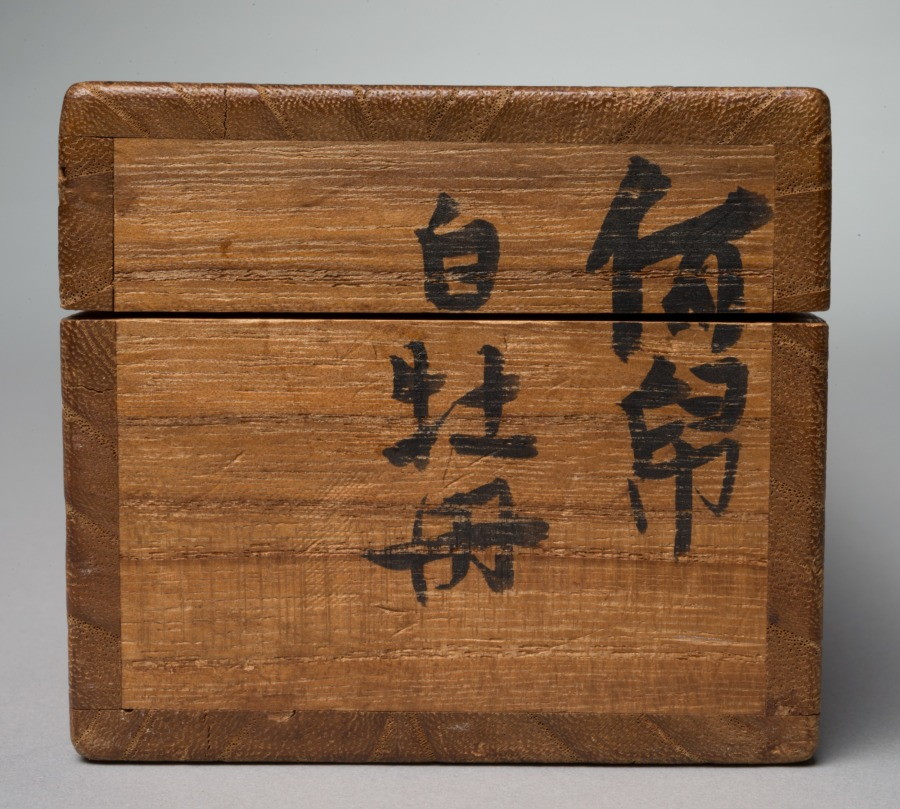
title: Peonies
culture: Japan, Edo period (1615–1868)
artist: Tatebayashi Kagei (Japanese, active mid-1700s)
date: mid 1700s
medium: hanging scroll; ink and color on paper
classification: Painting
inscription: lower right, Kagei's signature in black, a round red seal and a small square one.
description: A proliferation of white tree peonies dominates this composition. Behind them are tall, feathery-topped susuki grasses and leafy deciduous trees. Tatebayashi Kagei restricted his palette to ink with red and white color, along with sparing use of green in the peony leaves and the blades of grass. He made generous use of the “dripping-in” (tarashikomi) technique, layering pooled ink and color, in the peony leaves. The areas left in reserve create the impression of insect-eaten or late season foliage.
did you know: In 1738, Kagei received a copy made by Ogata Kōrin of a fan painting by Tawaraya Sōtatsu from Kōrin's brother Ogata Kenzan, so some think he trained with Kenzan in Edo (present-day Tokyo).